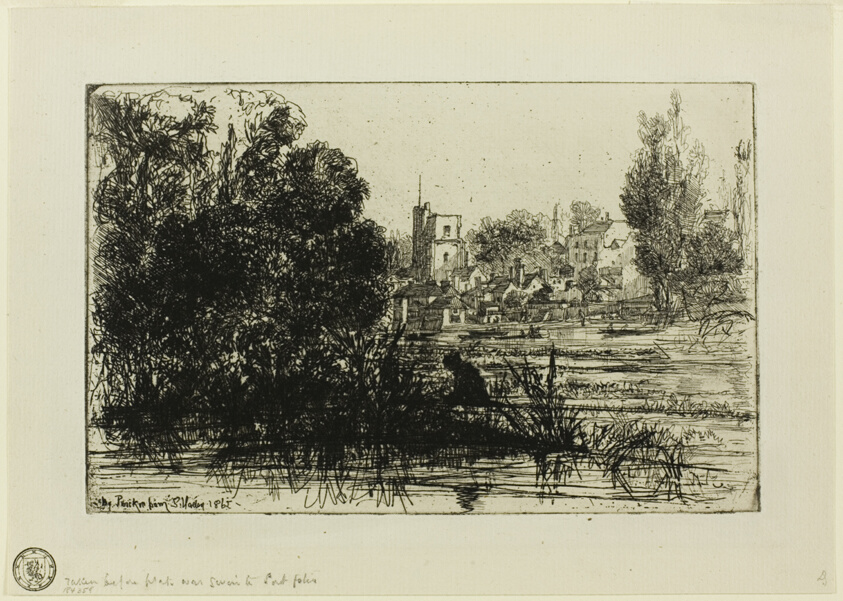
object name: Print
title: Twickenham Church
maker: Francis Seymour Haden (English, 1818-1910)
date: 1865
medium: Etching on cream laid paper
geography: England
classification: etching; print; prints and drawing